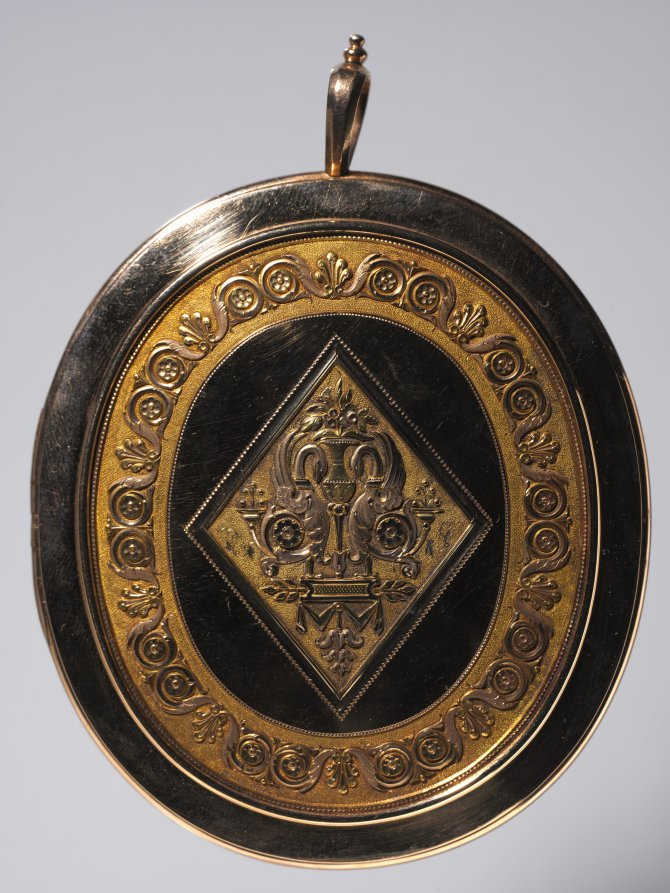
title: Portrait of Louis-Philippe, Duke of Orléans, later King of the French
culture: England, early 19th Century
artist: Richard Cosway (British, 1742–1821)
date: 1804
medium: watercolor on ivory in a gold locket frame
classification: Portrait Miniature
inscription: signed on backing: Rdus Cosway / R.A. et F.S.A. / Primarius Pictor / Serenissimi Walliae / Principie / Pinxit / 1804.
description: Louis-Philippe (1773–1850, king of the French 1830–48) was the son of Louis-Philippe Joseph, duc d’Orléans, who was known as Philippe-Egalité during the French Revolution. The Orléans family was a branch of the House of Bourbon. This work was painted while Louis-Philippe was in exile and living in England from 1800 until 1815, when Napoleon abdicated. He finally succeeded Charles X as king of France in 1830. During the February Revolution of 1848, Louis-Philippe was again forced into exile in England where he died two years later. Richard Cosway had painted Louis-Philippe (as well as his siblings and father) when the family was in England immediately following the outbreak of revolution in 1789. Louis-Philippe would have been thirty-one years old when this work was executed. He wears the Order of the Holy Spirit, a chivalric order of the French monarchy, which can be distinguished by its white dove surrounded by green flames at the center of a Maltese cross, with fleur-de-lis between the arms of the cross. Instead of the brilliant turquoise and white cloud background traditionally associated with Cosway, this miniature has the more restrained, gray, hatched background that characterizes the artist’s later works. The surface of the work is much marred by an irreversible crystallization of the paint layer that further emphasizes the gray tones throughout. The form of the unmarked case is typically English, but the motif is French, which may indicate a French goldsmith imitating the English style. The motif resembles a swan composed of foliate scrolls. A lock of plaited brown hair is also enclosed under glass within the locket, facing the miniature.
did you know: Without DNA analysis it is impossible to know to whom the hair belonged, though the most likely candidate is Louis-Philippe himself.